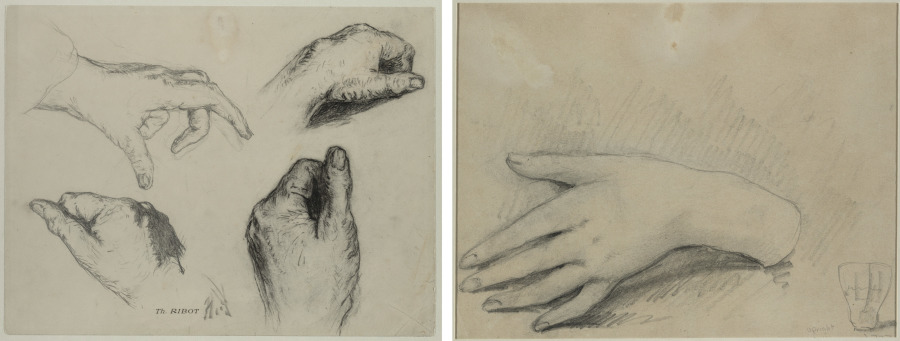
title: Study of Hands (recto); Study of a Woman's Hand (verso)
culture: France, 19th century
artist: Théodule Ribot (French, 1823–1891)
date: 1800s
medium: black chalk and graphite (recto)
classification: Drawing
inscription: inscribed in black ink, lower center; "Th. Ribot (estate stamp)